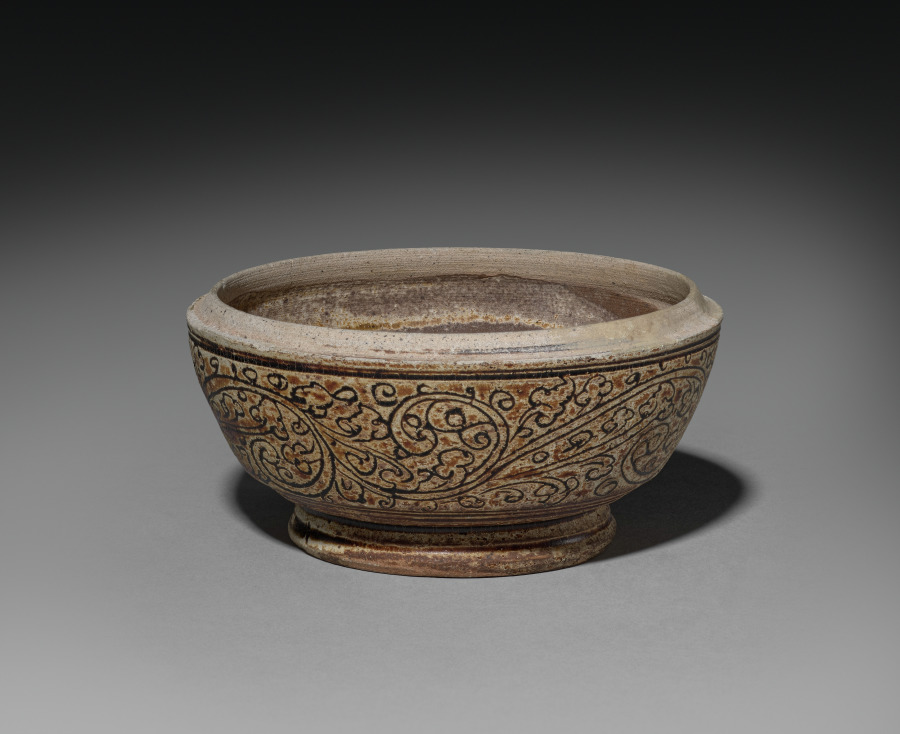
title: Covered Jar, Sawankhalok ware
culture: Thailand, Sukhothai Period, 14th century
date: 1300s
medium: pottery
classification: Ceramic